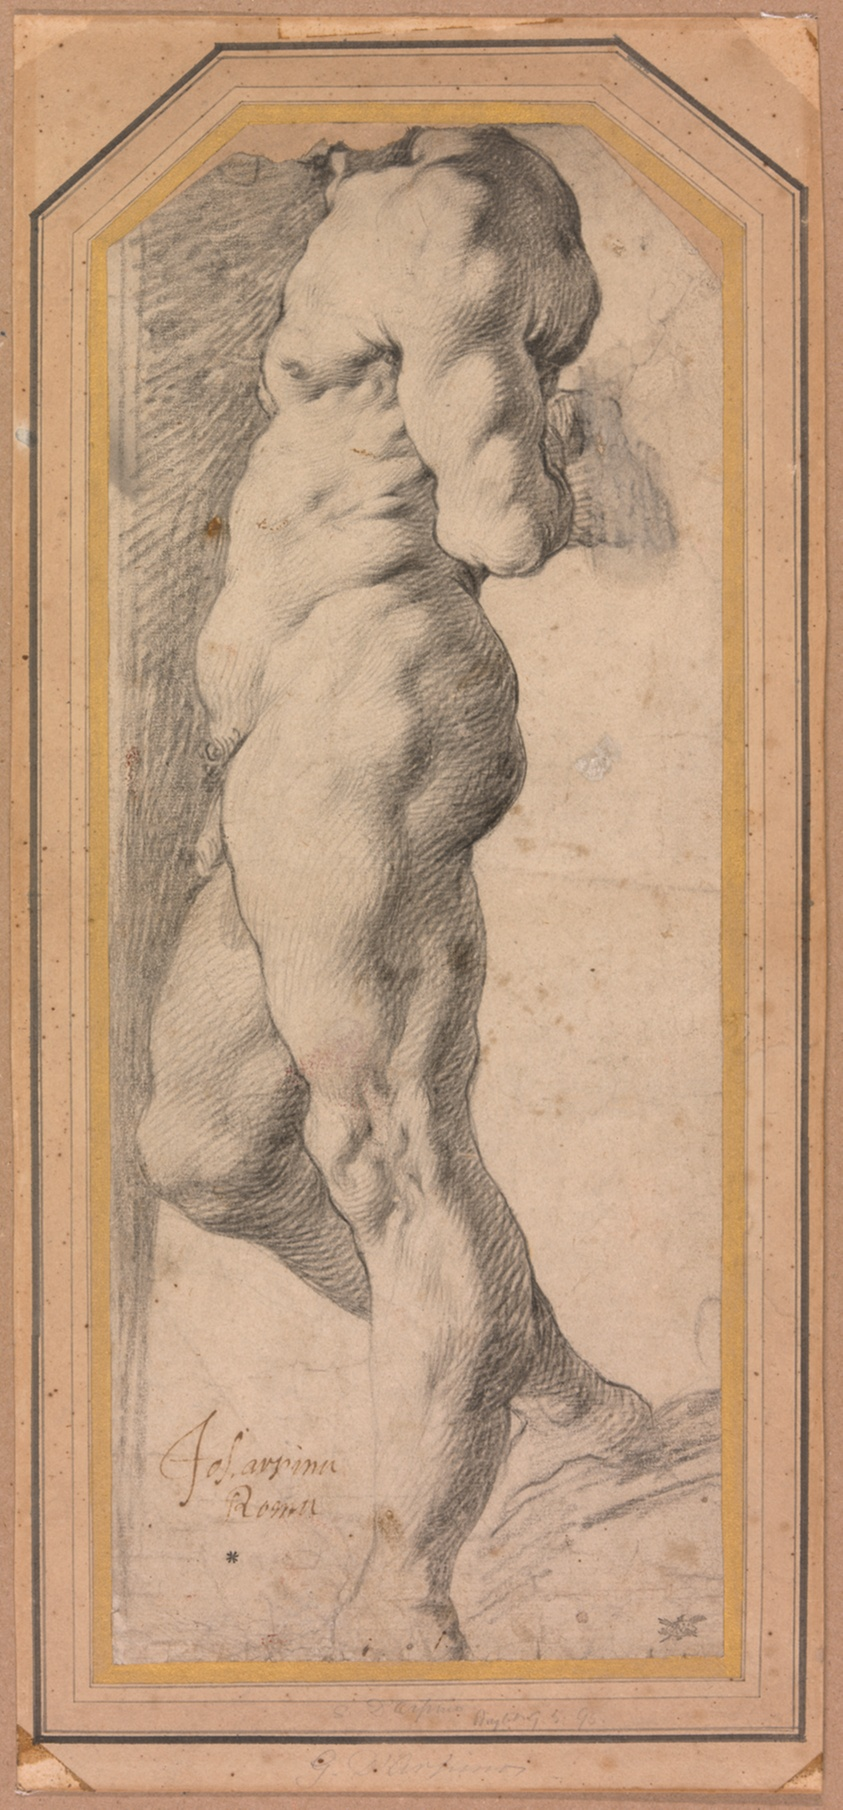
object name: Drawing and Watercolor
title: Study of a Standing Male Nude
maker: Giuseppe Cesari, called Cavaliere d'Arpino; Italian, 1568–1640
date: 1595/96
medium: Black chalk on laid paper, laid down on tan laid pulp board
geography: Italy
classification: drawings (visual works); chalk; paper; prints and drawing